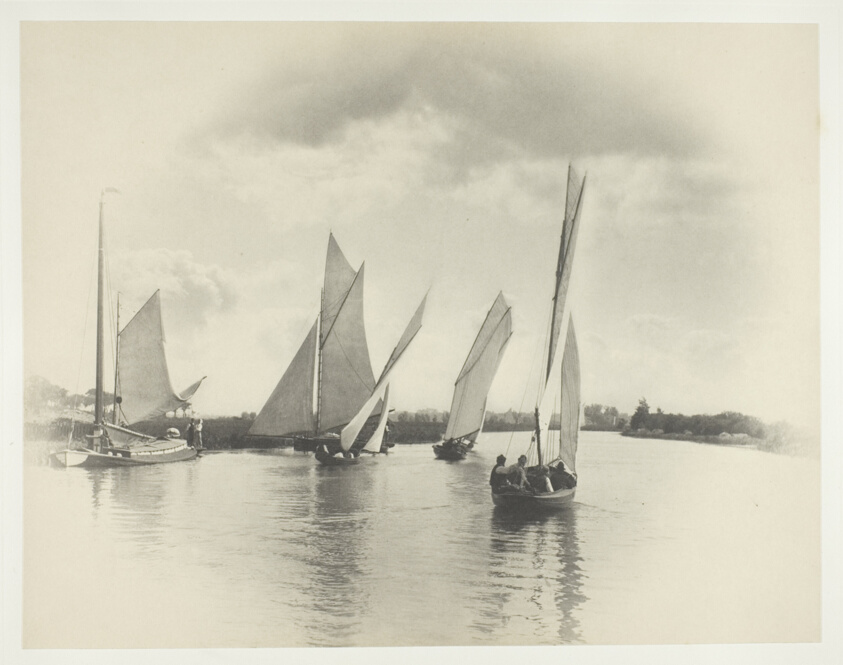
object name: Photograph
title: A Sailing Match at Horning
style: 19th century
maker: Peter Henry Emerson (English, born Cuba, 1856–1936)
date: 1885, printed 1886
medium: Platinum print, pl. IV from the album "Life and Landscape on the Norfolk Broads" (1886)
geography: England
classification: platinum print; photographic process; photography; photograph